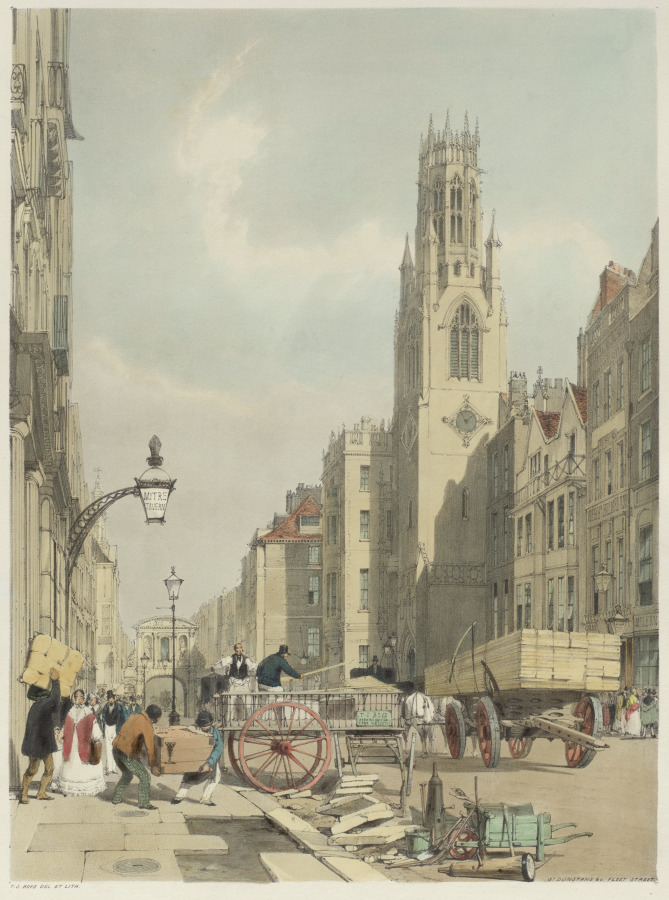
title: London As It Is: St. Dunstan's, Fleet Street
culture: England, 19th century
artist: Thomas Shotter Boys (British, 1803–1874)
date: 1842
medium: lithograph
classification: Bound Volume